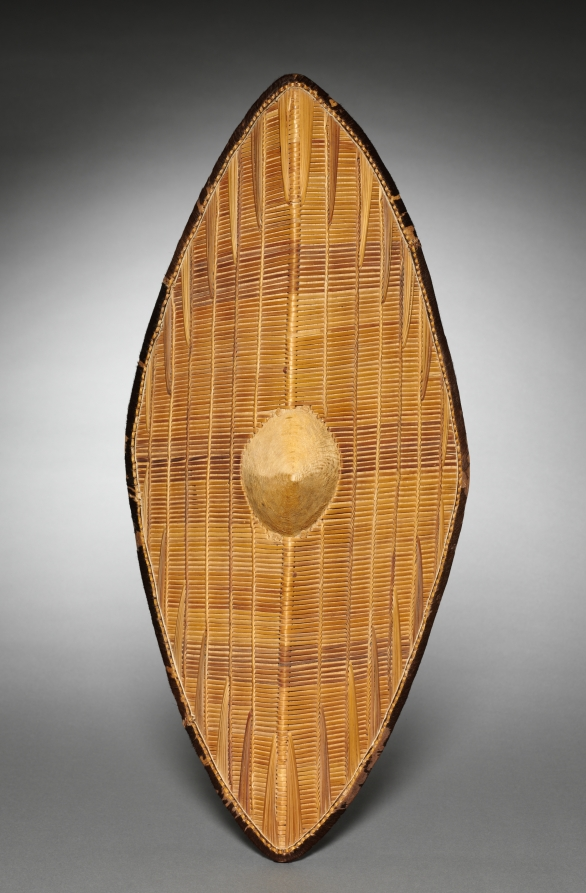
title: Shield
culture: Africa, Uganda/Kenya, unknown maker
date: by 1928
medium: Bamboo, wood, pelt, and plant fiber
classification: Arms and Armor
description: A shield with a similar shape is on the Ugandan coat of arms, adopted in 1962 to mark the country's independence from Great Britain.